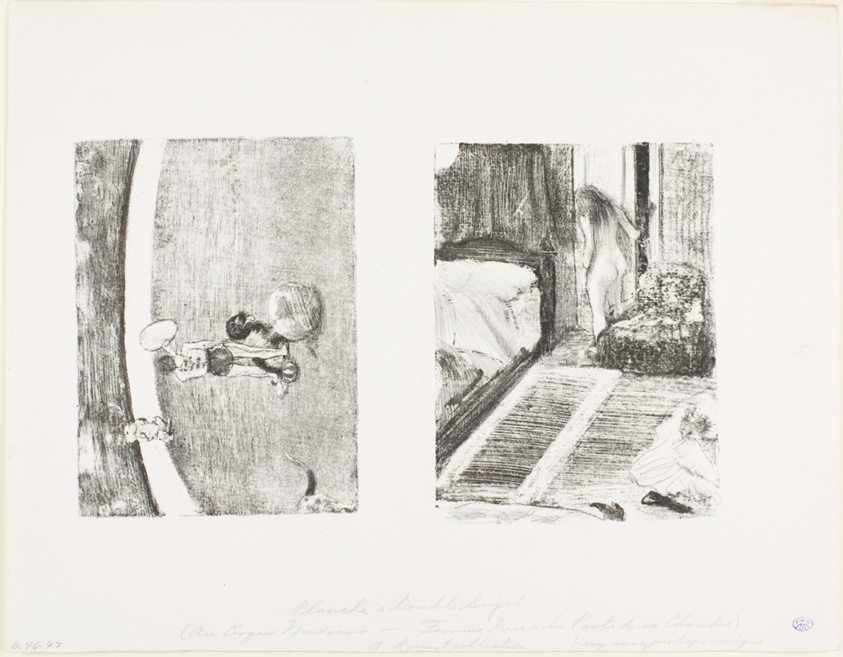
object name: Print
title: Nude Woman at the Door of her Room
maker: Edgar Degas; French, 1834-1917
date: 1879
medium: Lithograph in black on white wove paper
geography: France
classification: lithograph; print; prints and drawing; paper